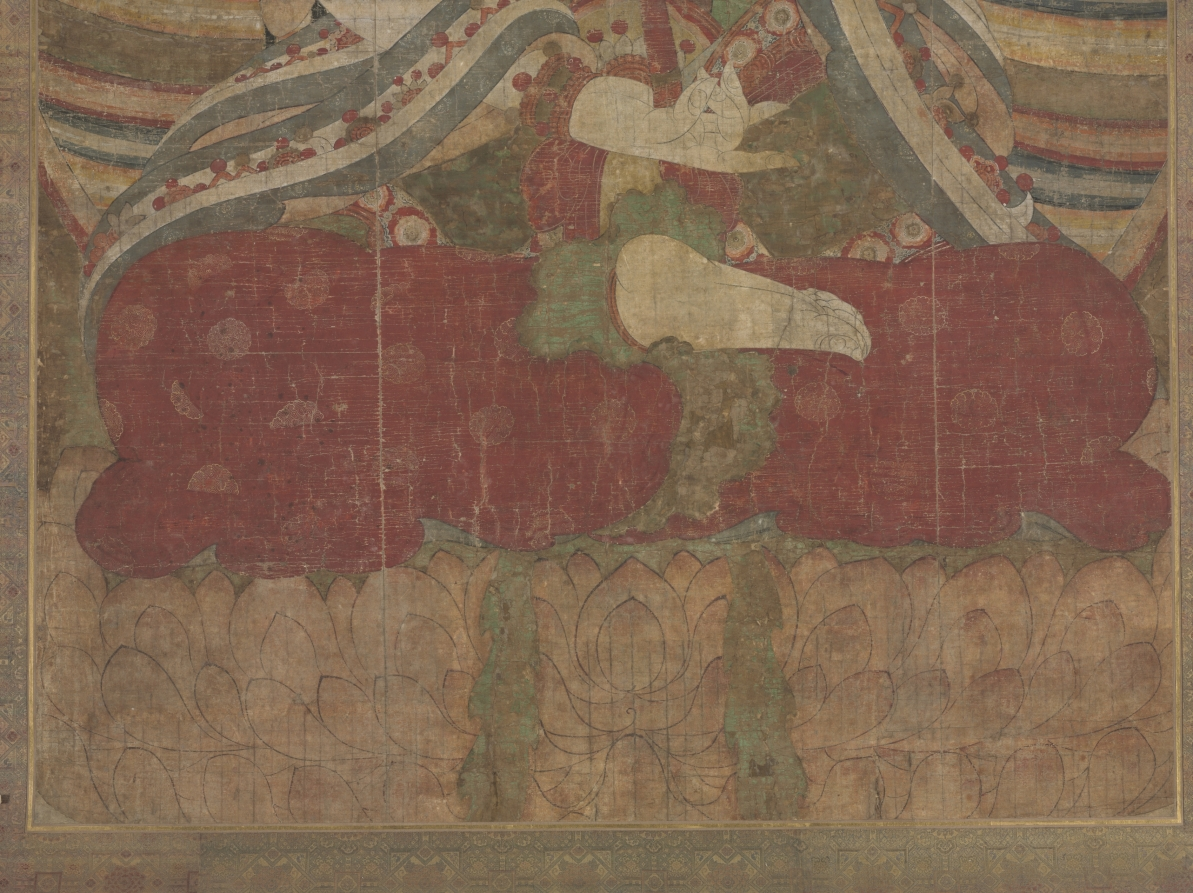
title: Seated Manjusri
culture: Korea, Joseon dynasty (1392–1910)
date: 1700s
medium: hanging scroll; ink and color on silk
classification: Painting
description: Large-size Buddhist paintings dated to the Joseon period (1392–1910) were once hung behind Buddhist statues, attached to the wall. In the Buddhist pantheon of the Joseon period, Bodhisattva Manjusri appears as a deity attendant to Vairocana Buddha.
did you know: Bodhisattva Manjusri is holding a ruyi scepter to represent ultimate wisdom.